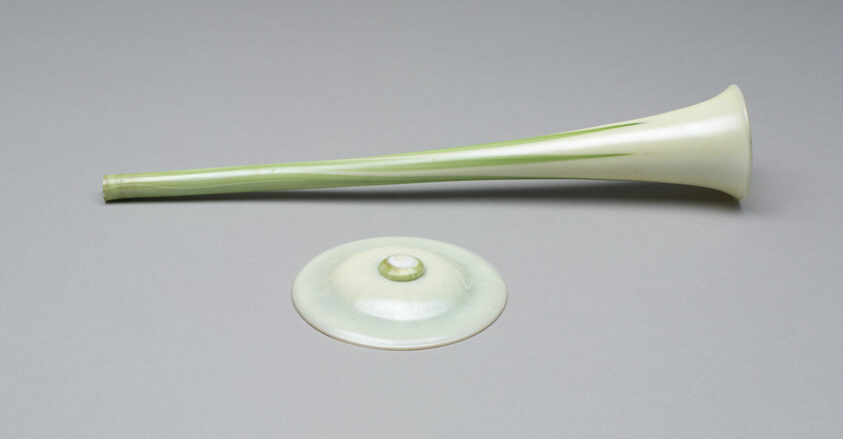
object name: Glass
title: Vase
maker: Louis Comfort Tiffany (American, 1848–1933); Tiffany Studios (American, 1902–32); Corona, New York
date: 1915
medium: Favrile glass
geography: Corona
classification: vase; glass; american decorative arts; american arts; decorative arts